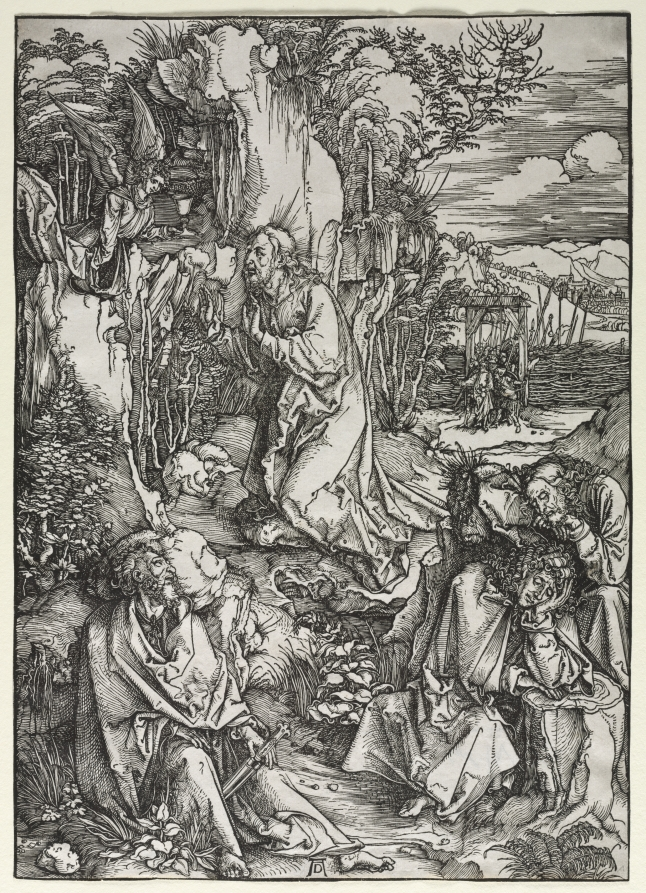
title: The Large Passion: Christ on the Mount of Olives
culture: Germany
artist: Albrecht Dürer (German, 1471–1528)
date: c. 1497–1500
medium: woodcut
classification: Print